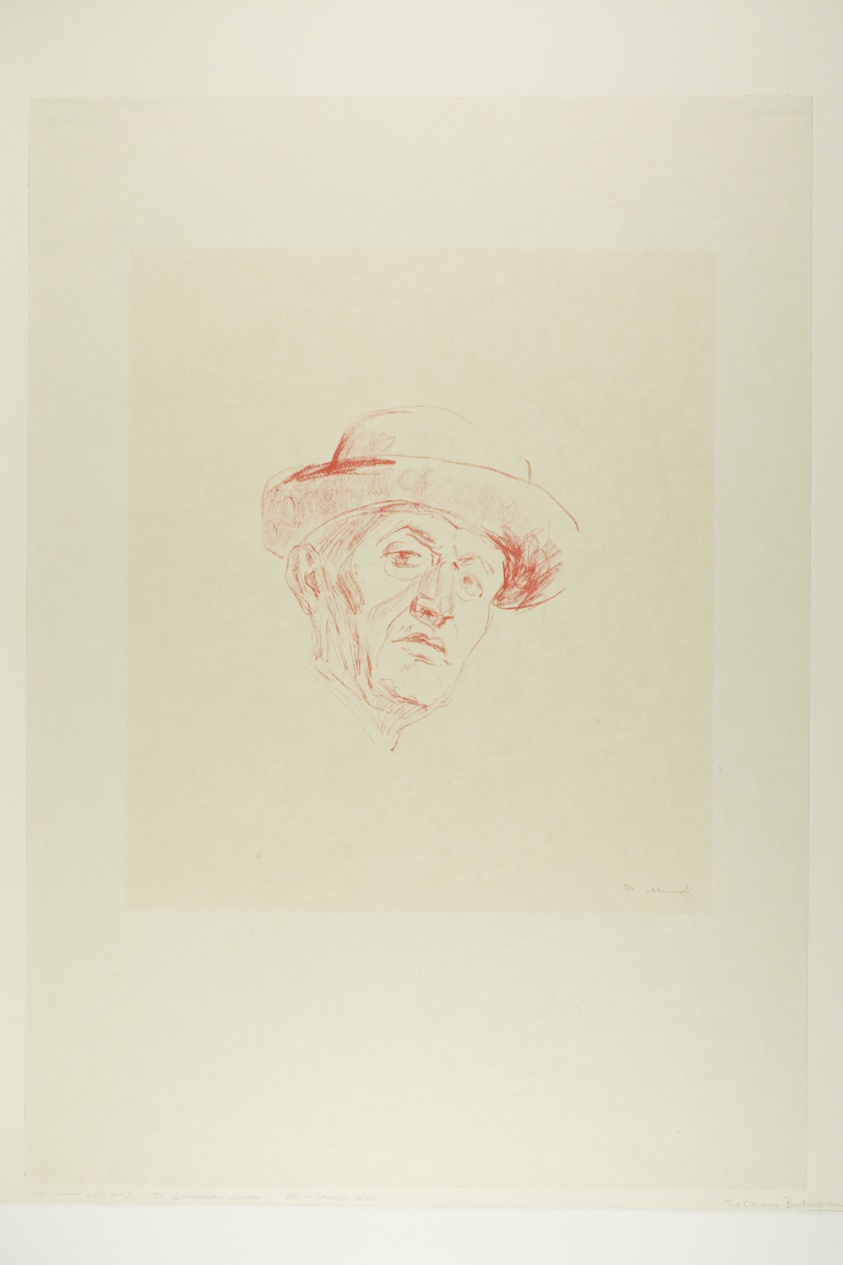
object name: Print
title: Self-Portrait with Hat I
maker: Edvard Munch (Norwegian, 1863-1944)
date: 1927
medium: Lithograph printed in red ink on Japanese paper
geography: Norway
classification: lithograph; print; prints and drawing